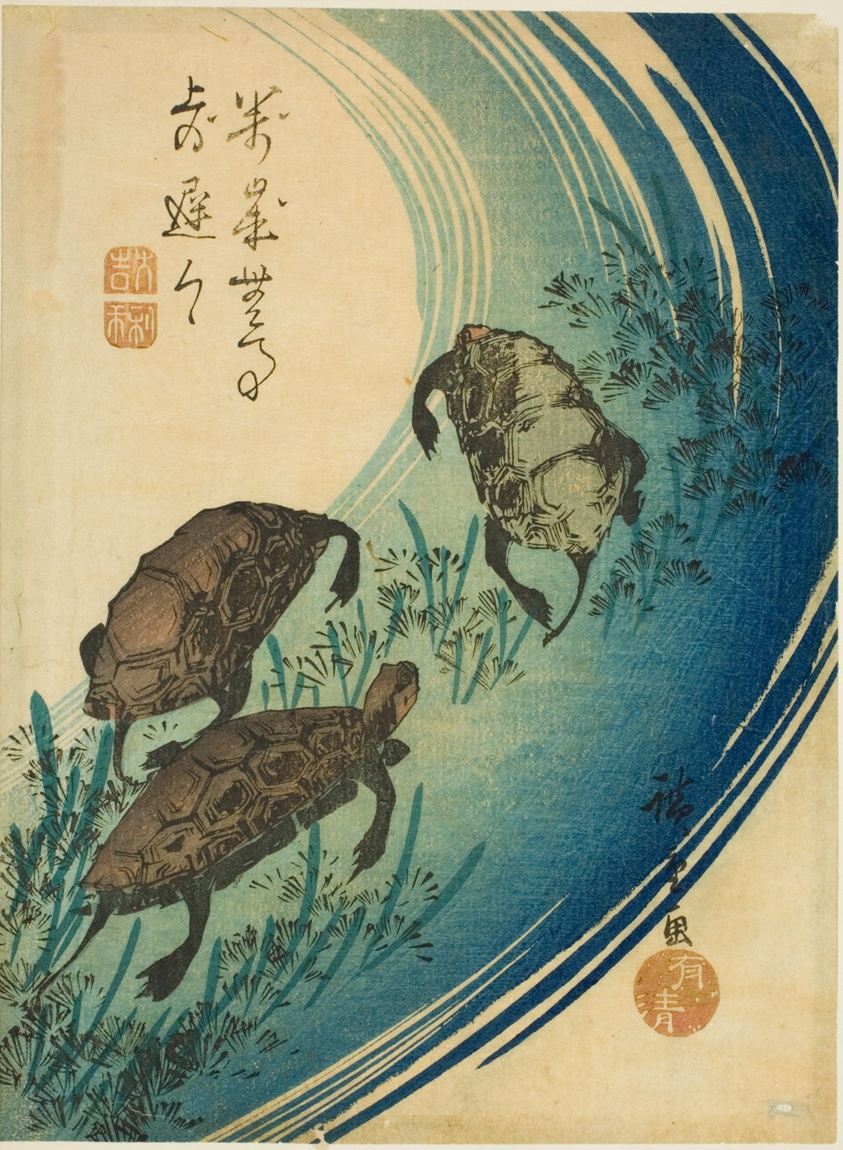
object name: Print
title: Turtles swimming in a stream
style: Japanese (culture or style)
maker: Utagawa Hiroshige 歌川 広重; Japanese, 1797-1858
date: c. 1840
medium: Color woodblock print; koban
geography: Japan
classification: woodblock print; print; asian art